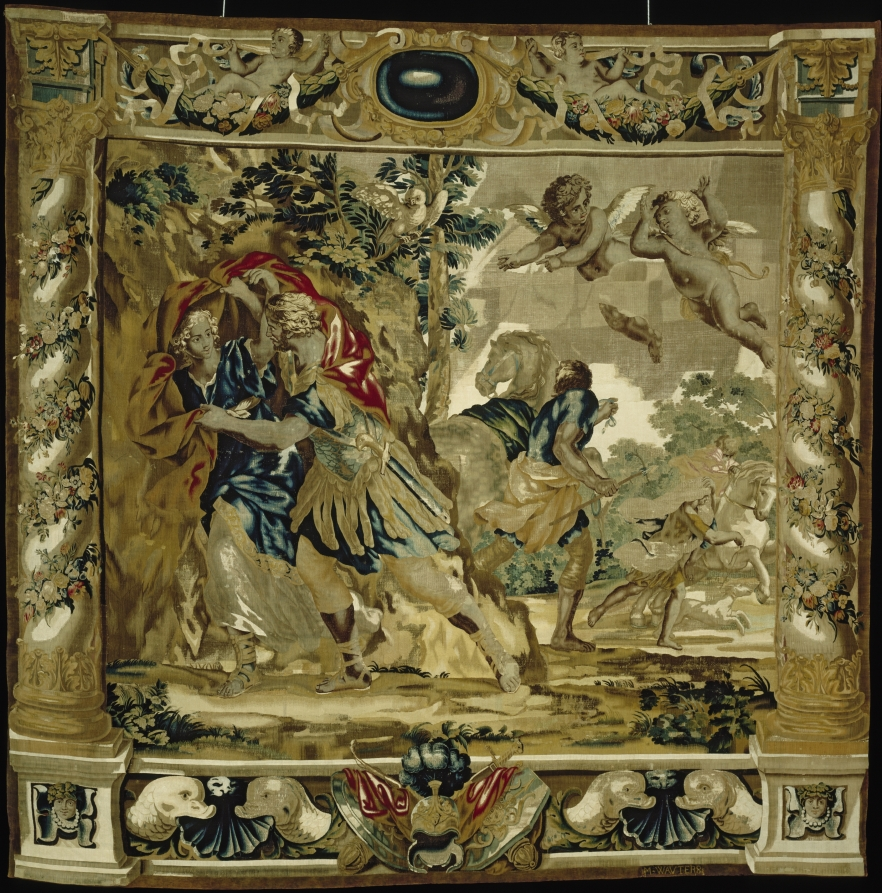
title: Dido and Aeneas seek shelter from a storm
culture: Belgium, 17th century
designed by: Giovanni Francesco Romanelli (Italian, 1610–1662)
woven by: Michael Wauters (Flemish, 1679)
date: 1679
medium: tapestry weave: silk and wool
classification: Tapestry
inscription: signed lower right: M. Wavters.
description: During a hunting party, Dido and Aeneas are caught in a storm and flee to shelter. Cupid and Hymen, the god of marriage, bless them from above. Servants are working to attend to the frightened horses while on a branch, the owl of evil beats his wings ominously.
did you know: This tapestry is one from a series of eight that depicts the tragic love story of Dido and Aeneas. They were gifted to the museum for display in the armor court.